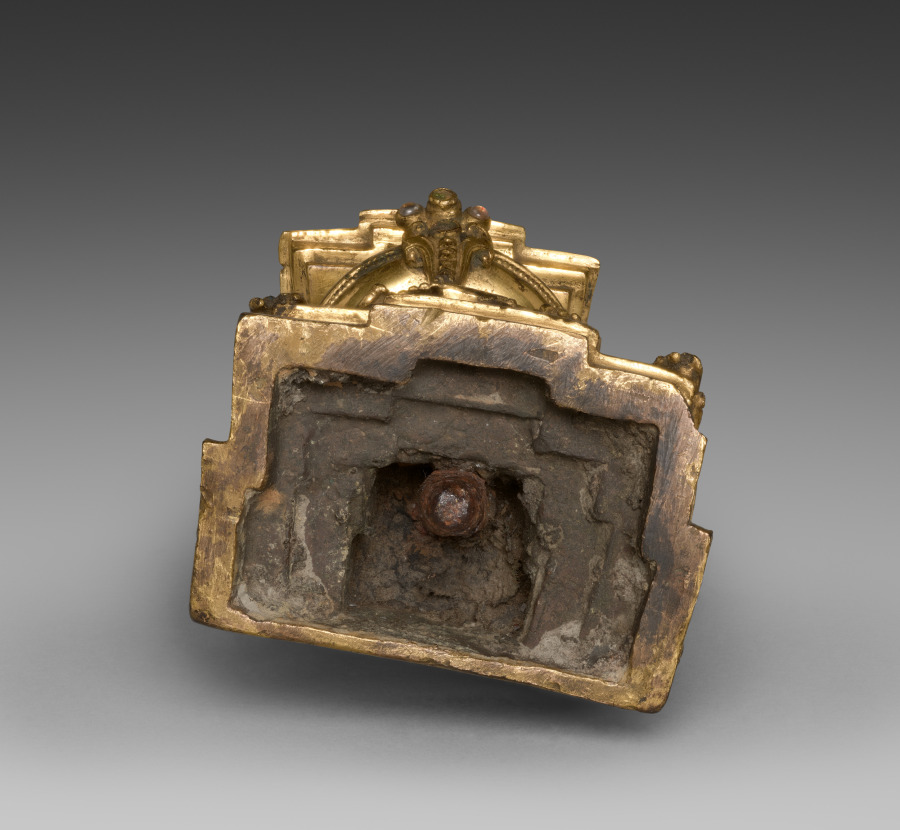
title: Support with Addorsed Figures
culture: Tibet, Densatil Monastery, 15th century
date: 1400s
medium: gilt bronze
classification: Sculpture